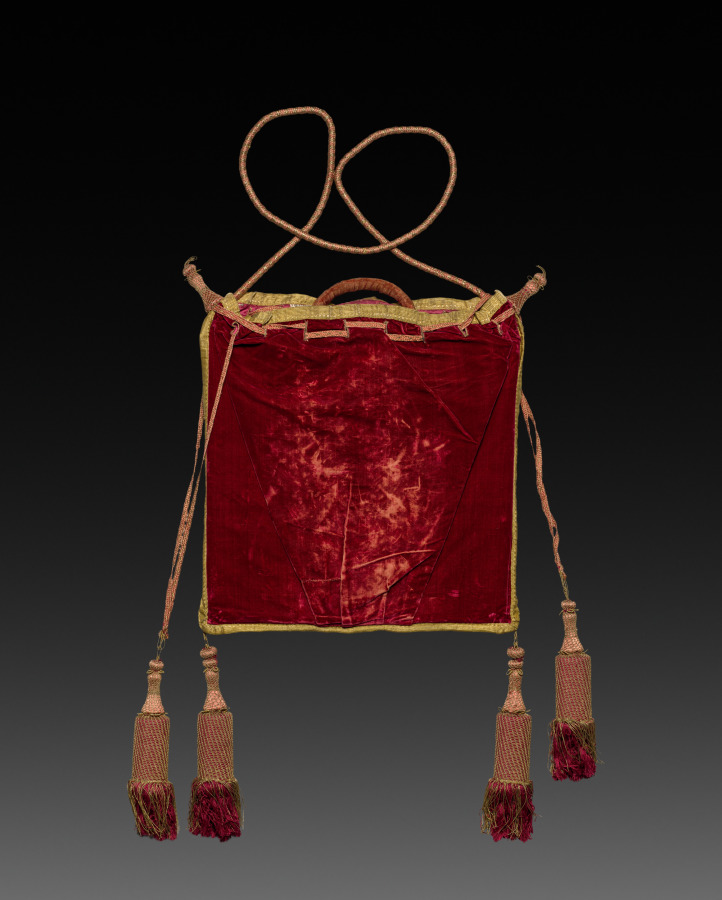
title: Lord Chancellor's Burse (Purse) with Royal Cypher and Coat of Arms of George III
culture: England, 18th century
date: 1700s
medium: red silk velvet, silk embroidery, goldwork, pearls, black beads, sequins, pendant tassels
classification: Velvet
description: A richly decorated burse (purse) to hold the monarch's Great Seal of the Realm has a traditional role in the opening of parliament. The safekeeping of the seal was the responsibility of the Keeper of the Great Seal, an office later incorporated into the role of Lord Chancellor. Because the Great Seal was attached to all major documents of state, it was the ultimate symbol of royal authority. The use of a special burse to hold the seal can be traced back to the end of the 13th century. By the end of the 16th century, the burse had evolved into the highly decorated, professional work of embroidery seen in this object. It includes the lion and unicorn surrounding the royal crest and is made from crimson velvet. Burses were replaced annually; it being a "perk" of office that the Lord Chancellor and Keeper of the Great Seal was allowed to keep the fragments of the old seal and accompanying burse. Portraits of Lord Chancellors, from the Tudor period onward, depict them with their burse. Cleveland’s collection includes one such portrait by American artist Gilbert Stuart (1755–1828) of Irish Lord Chancellor John FitzGibbon, 1st Earl of Clare (1748–1802) who was Lord Chancellor from 1789 to 1802. Baron FitzGibbon’s portrait (1919.910) is on view in gallery 204.